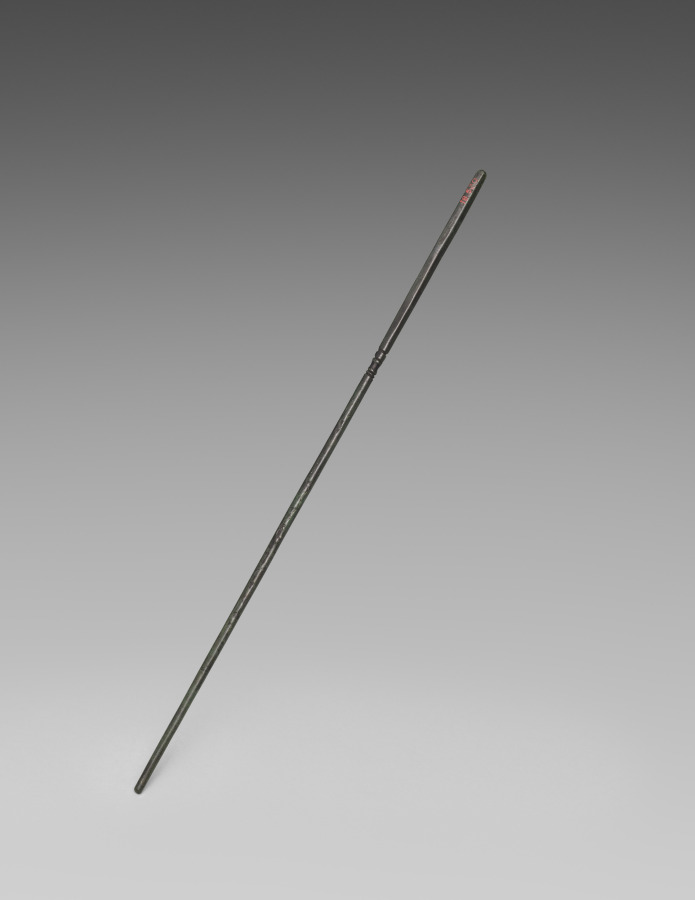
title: Chopstick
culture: Korea, Goryeo dynasty (918–1392)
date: 918–1392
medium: bronze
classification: Metalwork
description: In Korea, chopsticks made of metal such as brass, silver, and gold were excavated from ancient tombs and ruins dated to the 6th century at the earliest. Burial goods often include utilitarian objects such as table wares and utensils because the dead were believed to need them in the afterlife.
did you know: In contrast to the Chinese and Japanese, Koreans still prefer metal chopsticks (stainless steel and brass) to wooden ones.